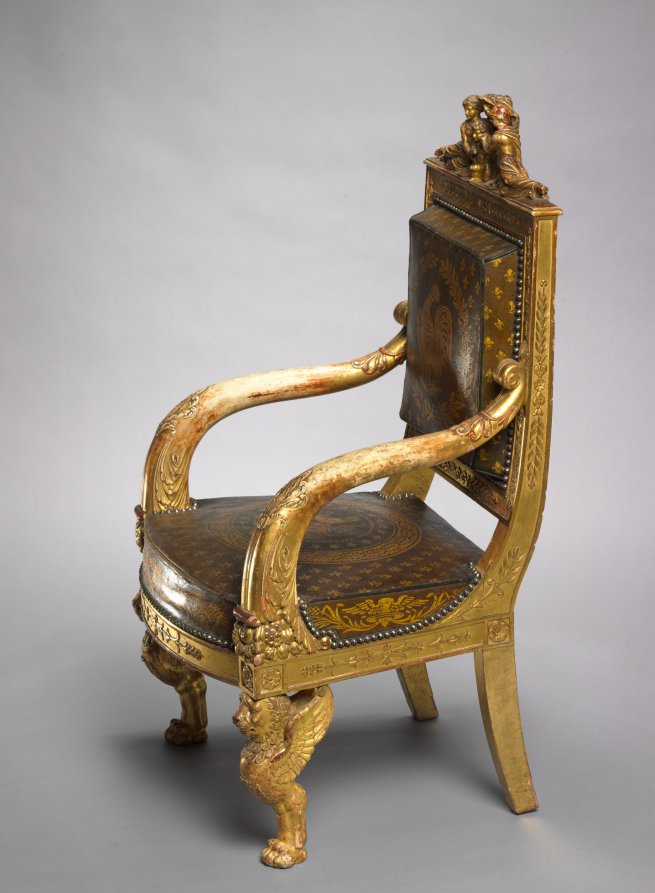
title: Child's Throne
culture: France, Paris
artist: Pierre-Marie Balny le Jeune (French, 1832)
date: 1822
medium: carved and gilded wood, leather upholstery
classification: Furniture and woodwork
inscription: inscribed with stencils inside back rail: BLONDEL TAPISSIER/RUE ST. ANTOINE N 72 1822 inscribed in ink lower edge back rail: 12 JANVIER 18[22?]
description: This chair was made for the young, presumed successor to the French throne who ruled briefly as Henri V in 1830, the last of the direct Bourbon line. He is depicted at the center of the top rail protected by female figures representing France and Minerva, the Roman goddess of wisdom. Fleurs-de-lis and the Gallic rooster, symbols of French royalty and the French people, decorate the upholstery.